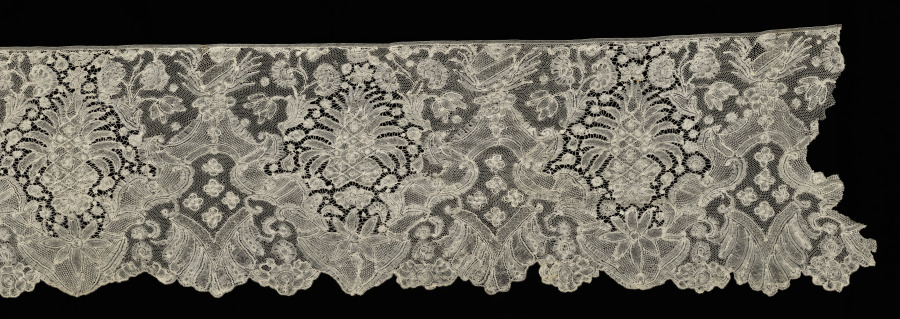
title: Lace Flounce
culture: Belgium, Brabant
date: 1700–1720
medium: Linen: bobbin lace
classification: Lace